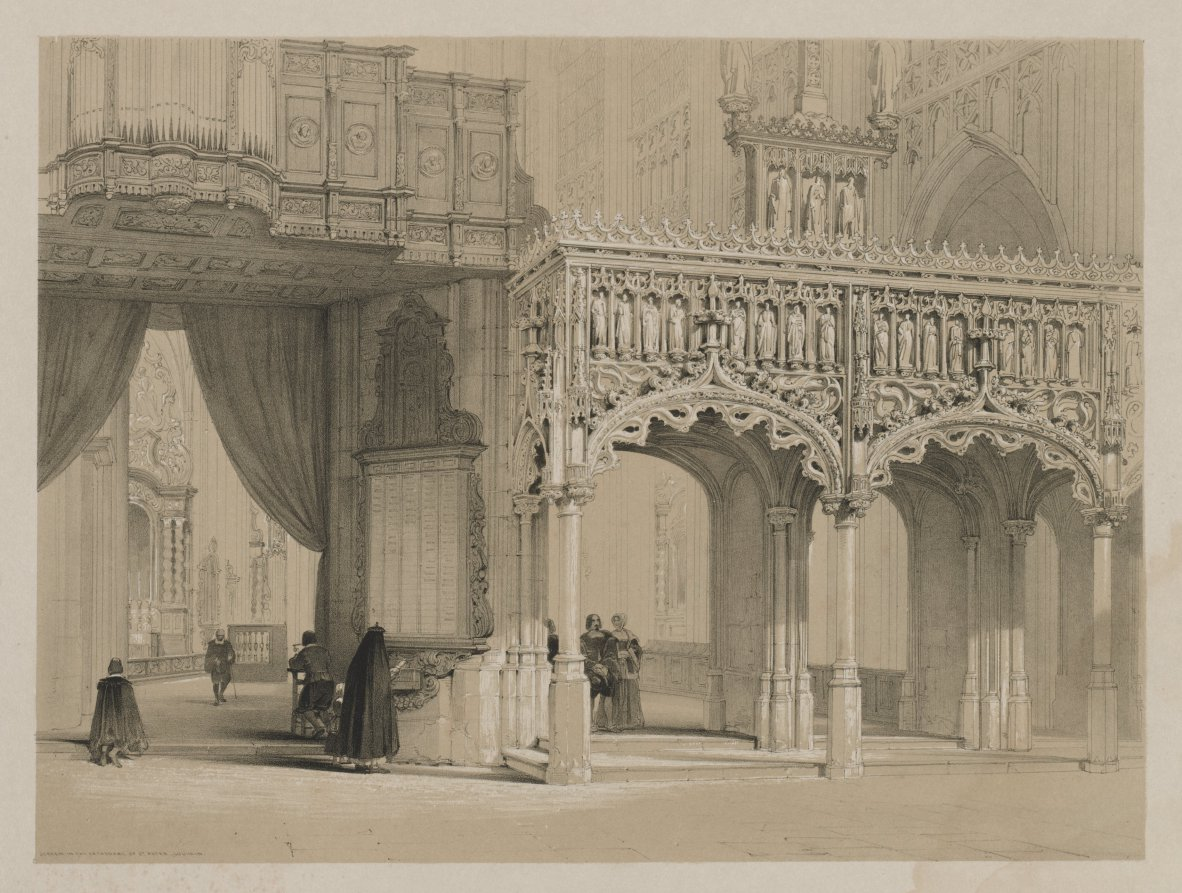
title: Sketches in Belgium and Germany, Volume I: Screen in the Cathedral of St. Peter, Louvain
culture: England, 19th century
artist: Louis Haghe (British, 1806–1885)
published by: Thomas McLean, Haymarket, London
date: 1840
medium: color lithograph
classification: Print